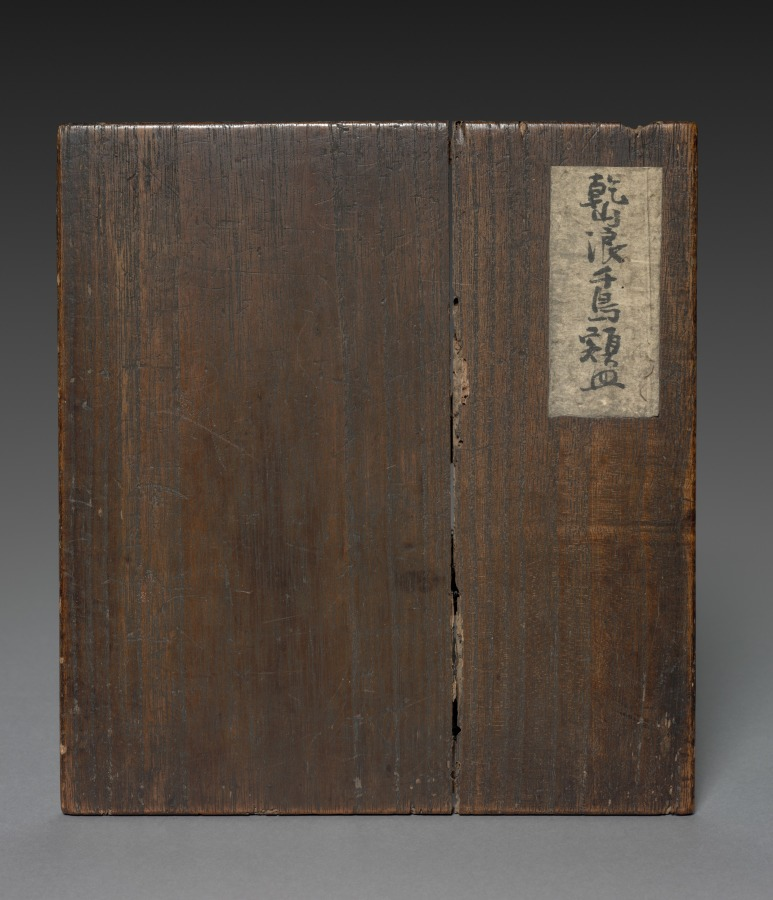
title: Square Dish with Design of Plovers over Waves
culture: Japan, Edo period (1615–1868)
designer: Ogata Kōrin (Japanese, 1658–1716)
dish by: Ogata Kenzan (Japanese, 1663–1743)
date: c. 1700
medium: Glazed stoneware with iron oxide underglaze slip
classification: Ceramic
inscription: design painted by Korin and signed "Jakumei Korin Gaku"; inner and outer faces of four walls probably painted by an assistant at the kiln, underside of dish signed, "Kenzan."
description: The Ogata brothers Kōrin and Kenzan often collaborated on ceramics. This dish is one of a set used for serving tea cakes. Kenzan shaped the dish, after which Kōrin drew the iron oxide design of plovers, a type of shorebird, flying over waves. Kenzan then covered the object with a clear glaze and fired it. Kōrin placed his signature next to his design, while Kenzan signed the back.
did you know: The design of plovers flying over waves derives from Heian period (900s–1100s) literature and later lacquerware designs.